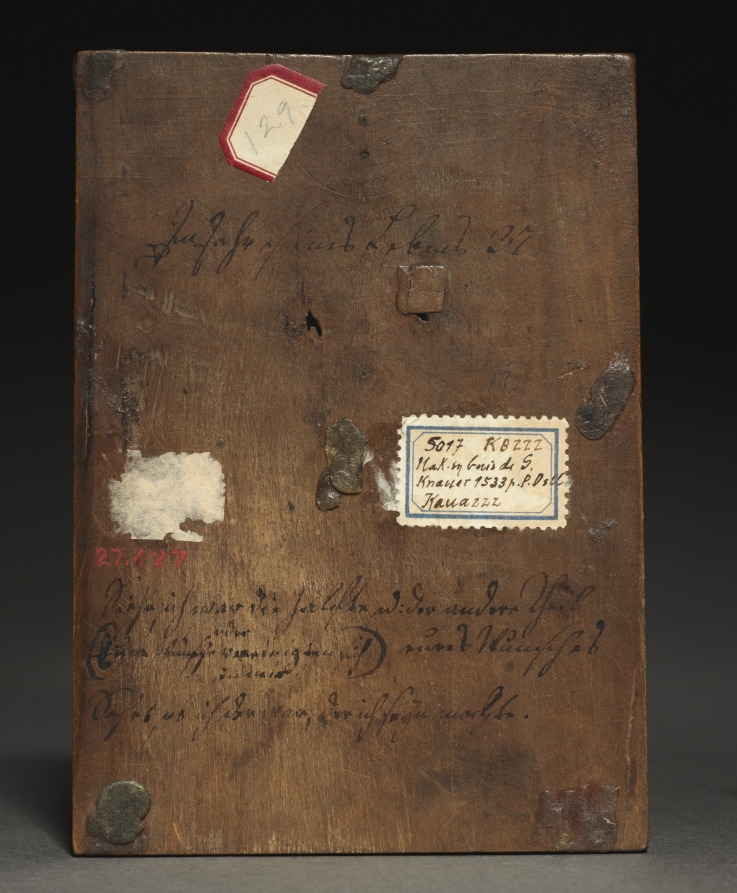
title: Portrait of Georg Knauer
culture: South Germany, 16th century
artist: Peter Dell (German, 1490–1552)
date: 1537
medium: pearwood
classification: Sculpture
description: George Knauer sits behind a classical archway holding a personal letter. His age appears in the background while the date and the artist's initials "PD" are in the corners. With this relief, Dell was competing with painted portraiture. The emergence of small portrait reliefs coincided with the growing popularity of portrait medals. Produced in limited numbers, roughly two hundred wood reliefs survive today.